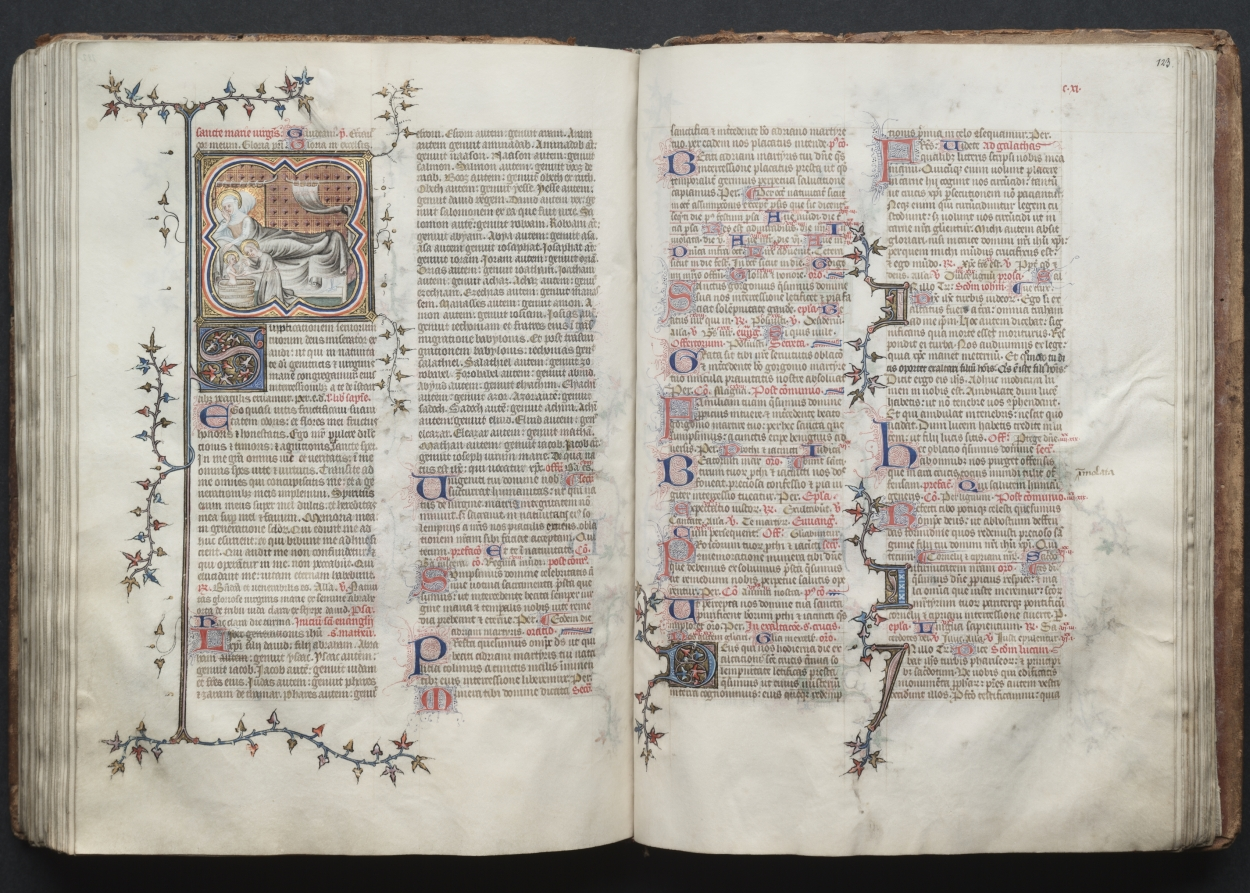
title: The Gotha Missal: Fol. 123r, Text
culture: France, Paris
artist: Master of the Boqueteaux (French)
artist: and Workshop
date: c. 1375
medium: ink, tempera, and gold on vellum; blind-tooled leather binding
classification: Bound Volume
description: The style and quality of this manuscript's decoration is typical of deluxe Parisian books made for aristocratic or royal patrons. Most of the book's decoration appears to be the work of the Master of the Boqueteaux, an artist active at the court of King Charles V (died 1380). His style was apparently shared by a number of book illuminators working in and around Paris. It is very possible that the Gotha Missal belonged to Charles V, but is not provable because the manuscript has no royal portraits and lacks a colophon. Given the book's magnificent decoration, however, it would seem that it was produced for a Valois prince, if not for the king himself. The manuscript receives its name from the German dukes of Gotha, its later owners.